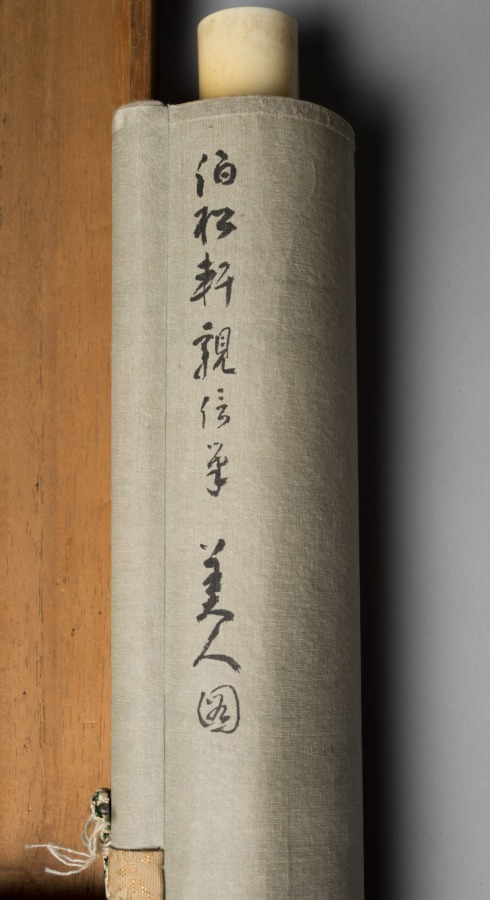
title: Courtesan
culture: Japan, Edo period (1615–1868)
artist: Matsuno Chikanobu (Japanese, active 1716–35)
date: 1716–35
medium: hanging scroll; ink and color on paper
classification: Painting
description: A glamorous courtesan sports an outer robe decorated with large roundels featuring plant motifs including iris and bush clover. Little is known about the life and artistic training of the painter Matsuno Chikanobu, an ukiyo-e artist who painted in a style strongly reminiscent of that of the Kaigetsudō studio. Many of his known paintings are on silk, and executed with high quality pigments, indicating that his primary clientele were wealthy individuals.